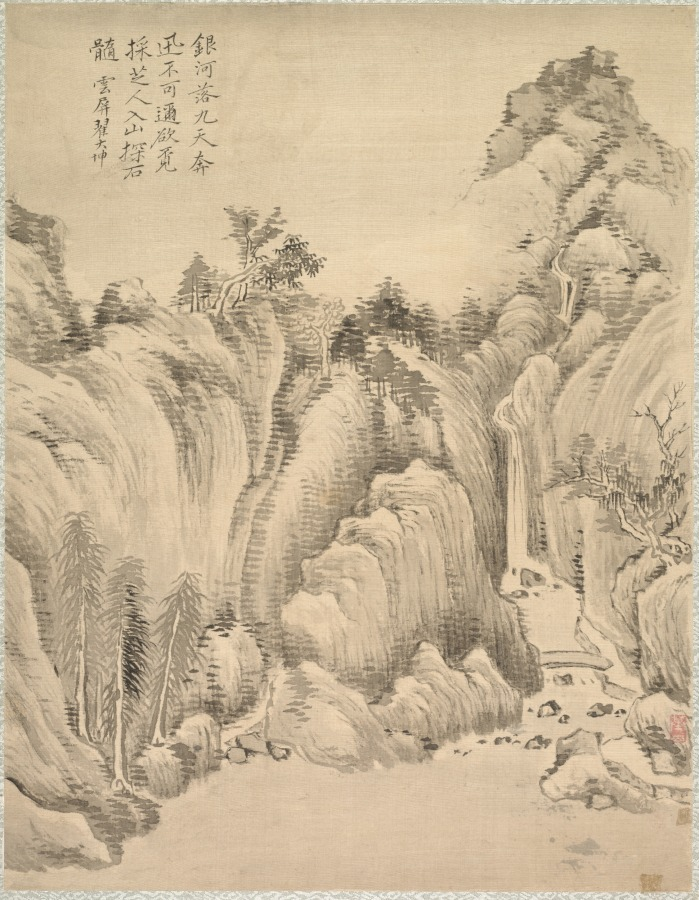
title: Waterfall and Rocks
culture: Japan, Edo period (1615–1868)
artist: Tsubaki Chinzan (Japanese, 1801–1854)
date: 1847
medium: album leaf; ink and color on silk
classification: Portfolio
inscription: Tsubaki Chinzan inscribed each leaf with the same inscription that Zhai Dakun wrote on his album leaves.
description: As the title of this album suggests, Tsubaki Chinzan painted each of the landscapes included in the album after interpretations of the styles of old masters by Chinese painter Zhai Dakun (翟大坤, active 1730–1804). In addition to the painted compositions, he also copied the inscriptions on Zhai Dakun's paintings.